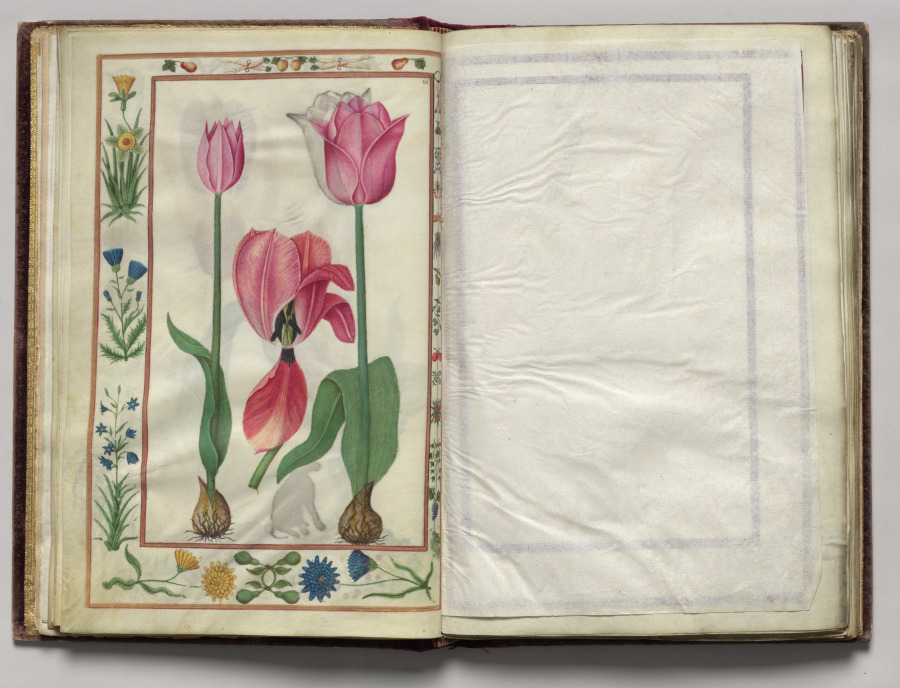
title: Tulips with Floral Border, folio 8 (verso), from Florilegium (A Book of Flower Studies)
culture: France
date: 1608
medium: watercolor, ink, silver, and gold over occasional traces of pencil, on vellum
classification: Bound Volume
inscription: Dated: Poitiers 1608 (on frontispiece) Signed: On frontispiece in black ink, lower right: Van Kuyk Notation on drawing: Frontispiece: in pencil, lower margin: * élève de Van Kessel, peintre flammand (* in pencil also appears in front of Van Kuyk's name).